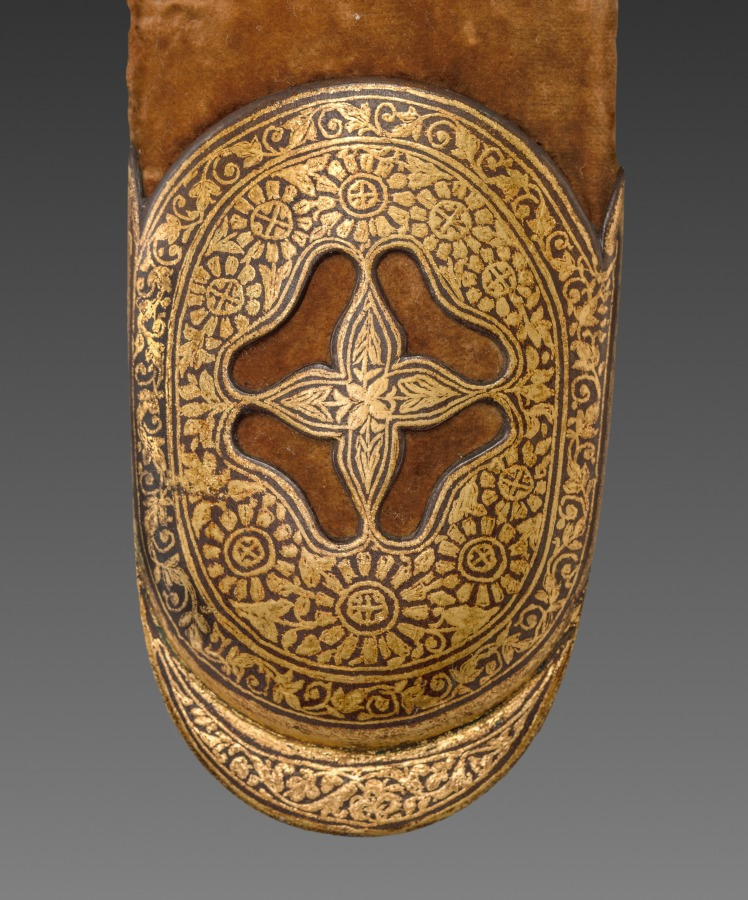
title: Scabbard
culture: India, perhaps Deccan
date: 1700s–1800s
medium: velvet lining with leather straps; wooden scabbard with velvet case and metallic threads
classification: Arms and Armor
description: Straight swords were typical of those used among military and aristocratic circles in the southern regions of the Deccan, in contrast to the curved swords favored by Central Asian equestrians. Increased contact between the Mughal north and the Deccan south during the 1600s led to the appearance of the Deccan-style sword in courtly portraits made during the time of Jahangir and Shah Jahan, and later.